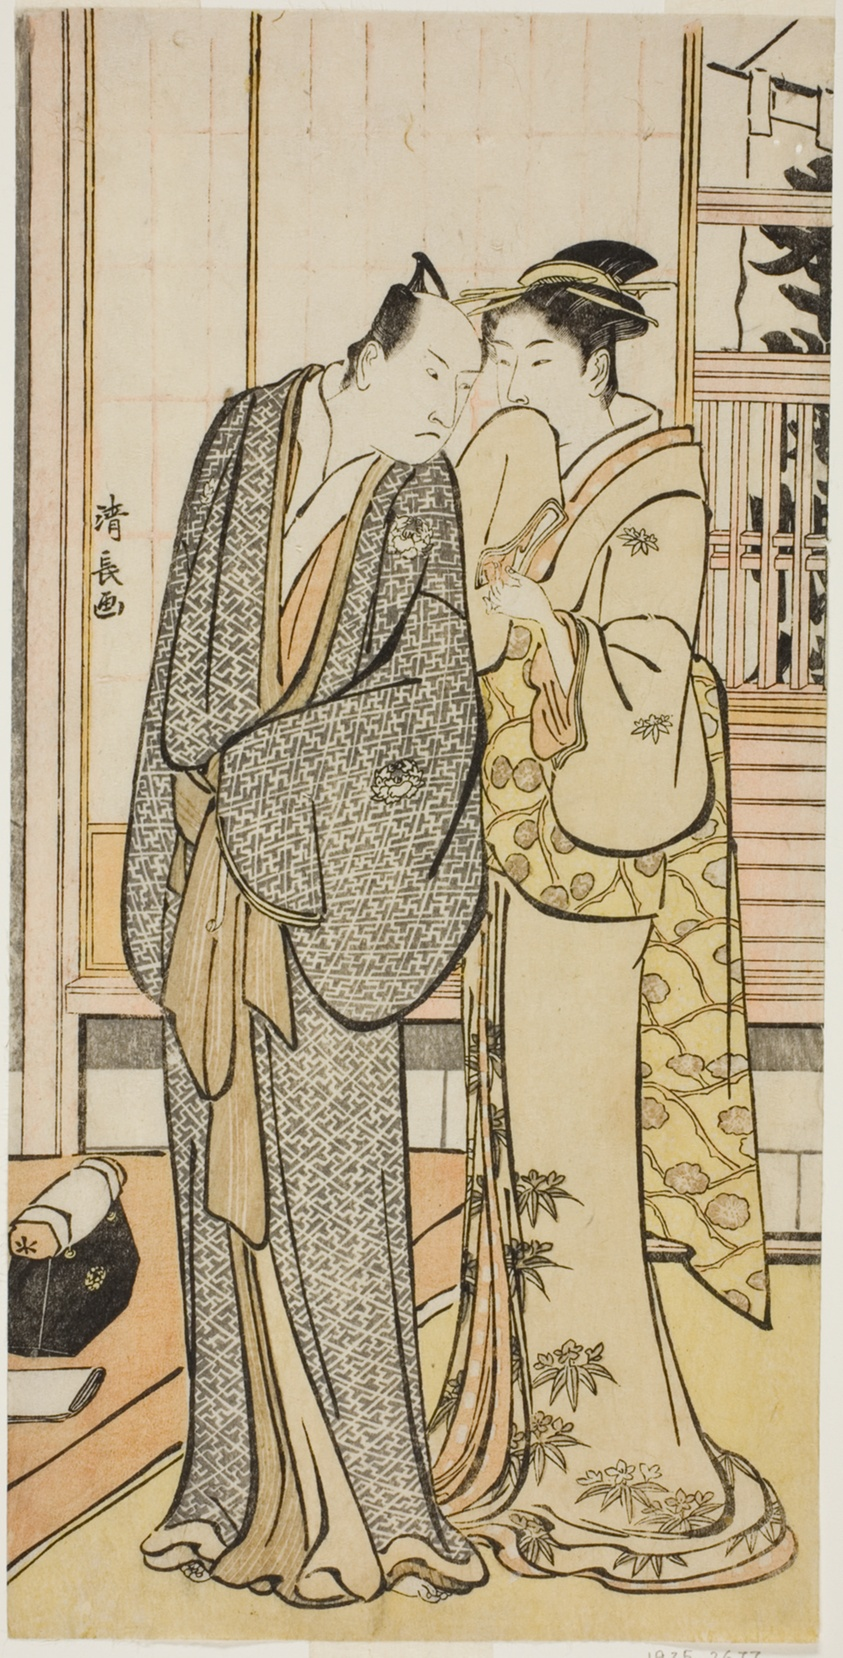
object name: Print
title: The Actor Ichikawa Yaozo III with a geisha, from an untitled series of prints showing Actors in private life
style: Japanese (culture or style)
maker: Torii Kiyonaga (Japanese, 1752-1815)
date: c. 1783/84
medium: Color woodblock print; hosoban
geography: Japan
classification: woodblock print; print; asian art